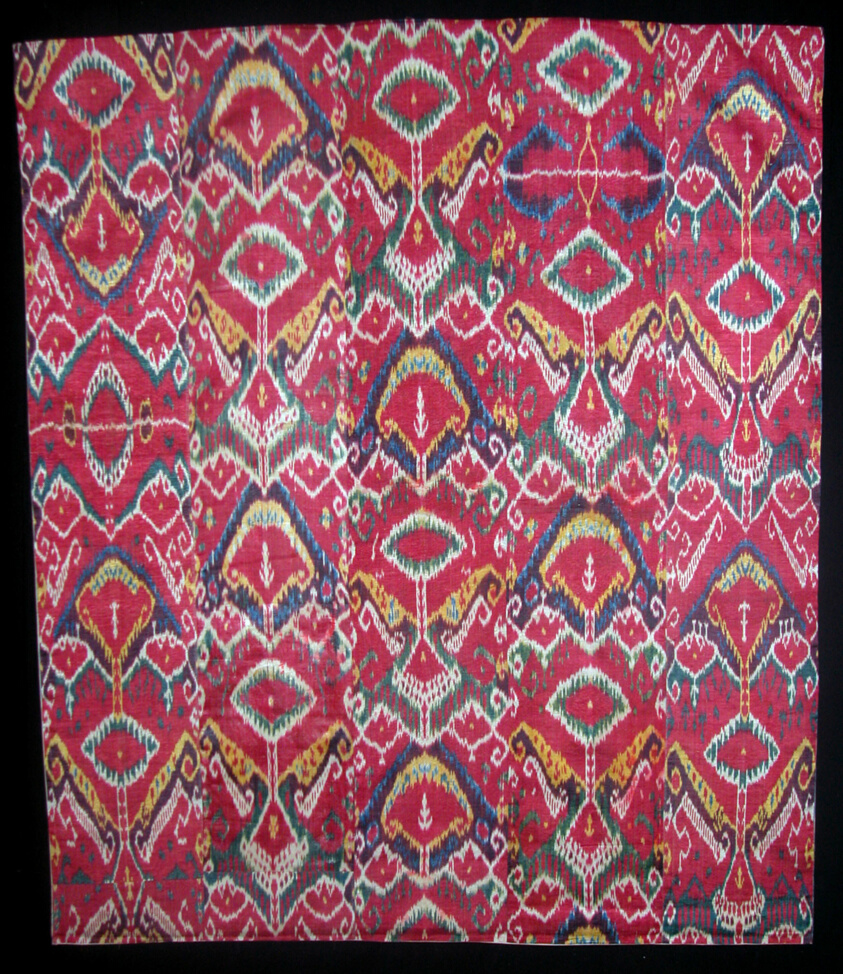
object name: Coverings and Hangings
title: Wall Hanging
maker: Uzbekistan, Bukhara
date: 1801/50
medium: Silk and cotton; warp-dyed, warp-faced plain weave (ikat)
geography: Uzbekistan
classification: textile; weaving